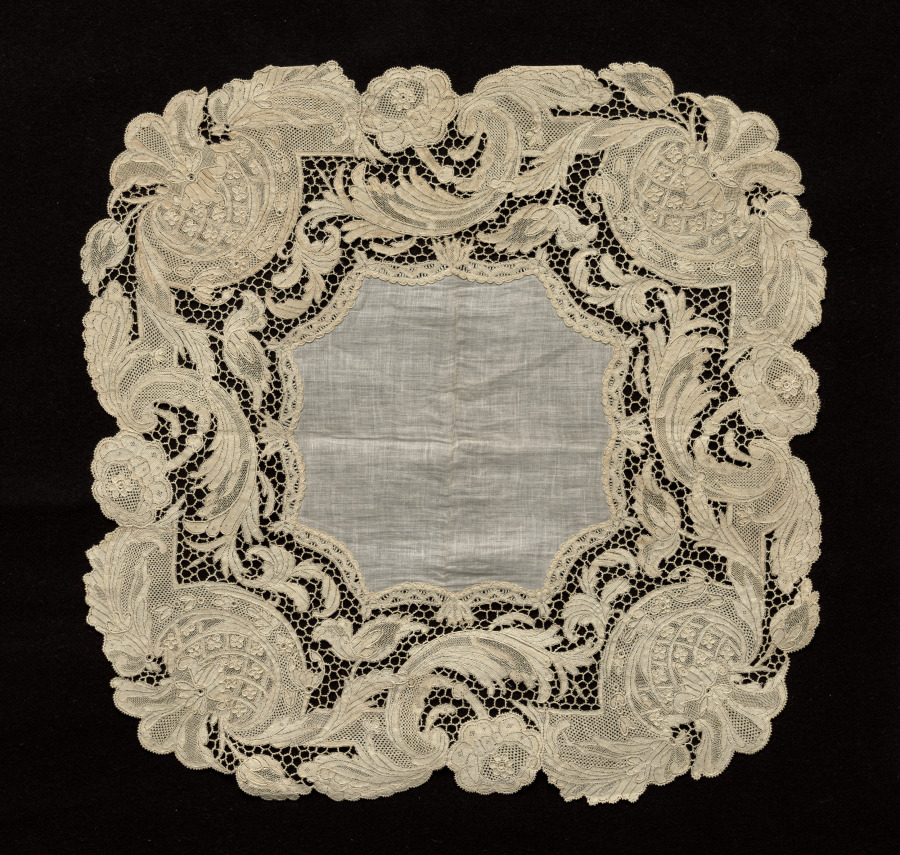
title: Lace Handkerchief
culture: France, Queen Margherita School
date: 1860–99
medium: Plain weave linen center; needle lace (Point de France) border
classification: Lace